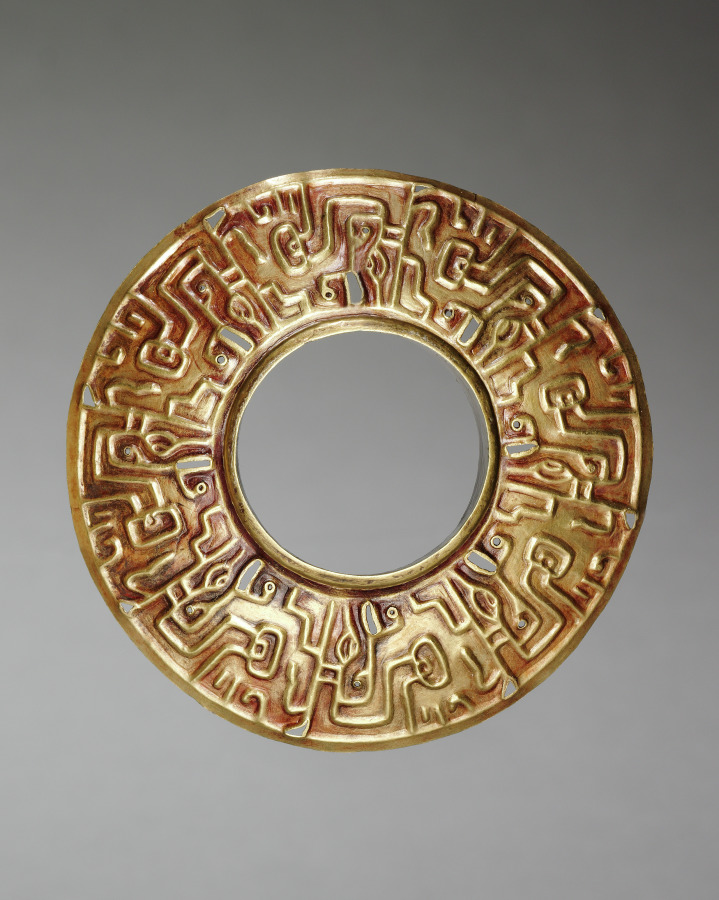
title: Ear Ornament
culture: Peru, North Highlands, Chavín de Huantar(?), Chavín style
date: c. 500–200 BCE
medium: hammered and cut gold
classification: Metalwork